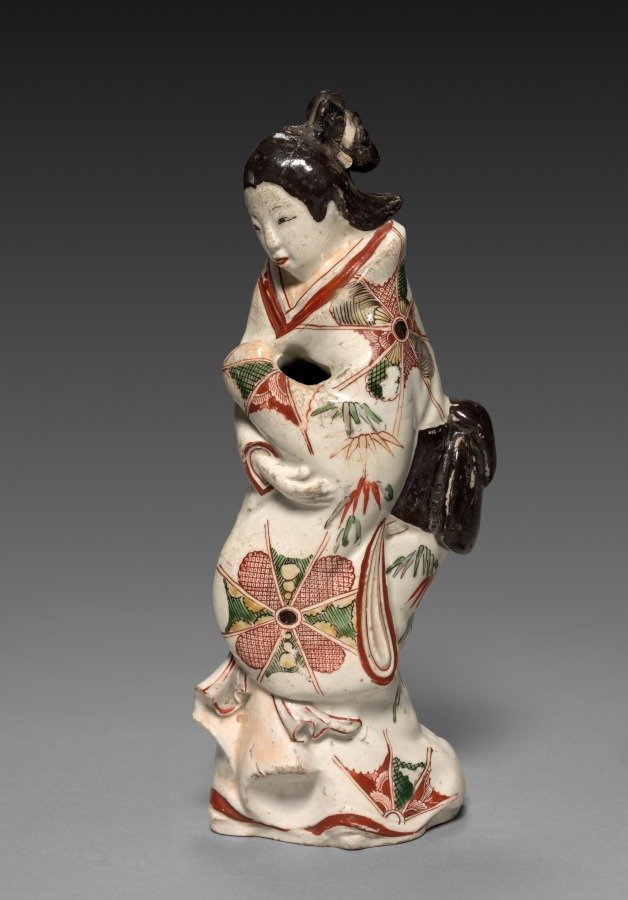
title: Standing Figure of a Beauty: Arita Ware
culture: Japan, Edo period (1615–1868)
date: 1600s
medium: porcelain with overglaze enamel decoration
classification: Ceramic